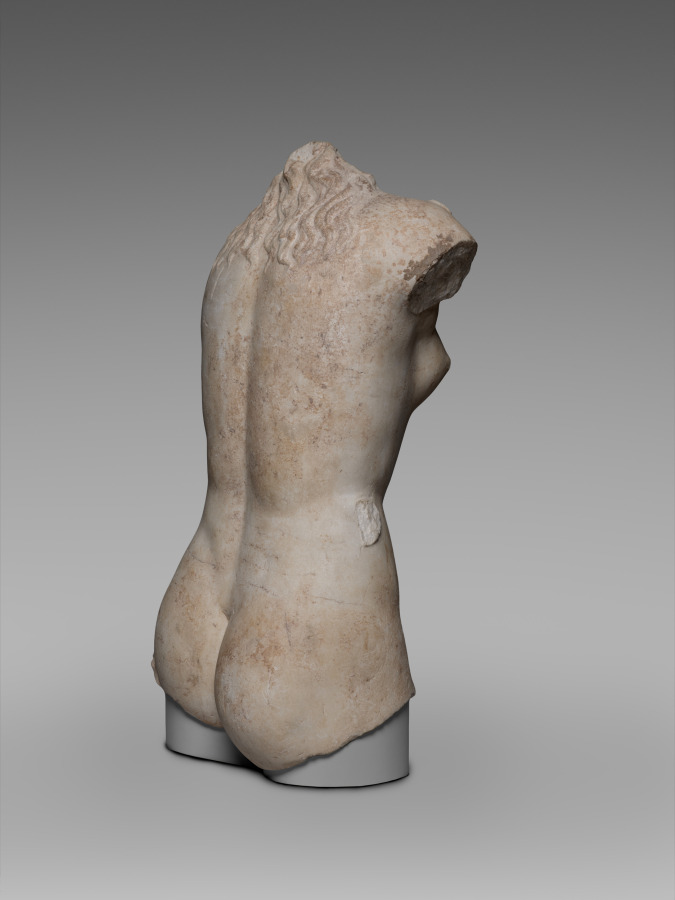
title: Aphrodite Torso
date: 200–1 BCE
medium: Thasian marble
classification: Sculpture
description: This torso can be identified through its nudity and pose as the Greek goddess of love, Aphrodite. Based on the now-lost Aphrodite of Knidos, a revolutionary marble sculpture created by Praxiteles of Athens in the mid-300s BCE, this sculpture belongs to a popular Greek and Roman type showing the goddess at her bath. With hips slightly shifted, she stood in a relaxed posture with most of her weight on one leg, probably with one hand modestly covering her pubic region and the other shielding her breasts or holding drapery. Alternatively, one or both hands may have tended to her wet hair, some of which falls over her neck and upper back.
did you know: This torso is based on the Aphrodite of Knidos, a Greek original by the master sculptor Praxiteles.